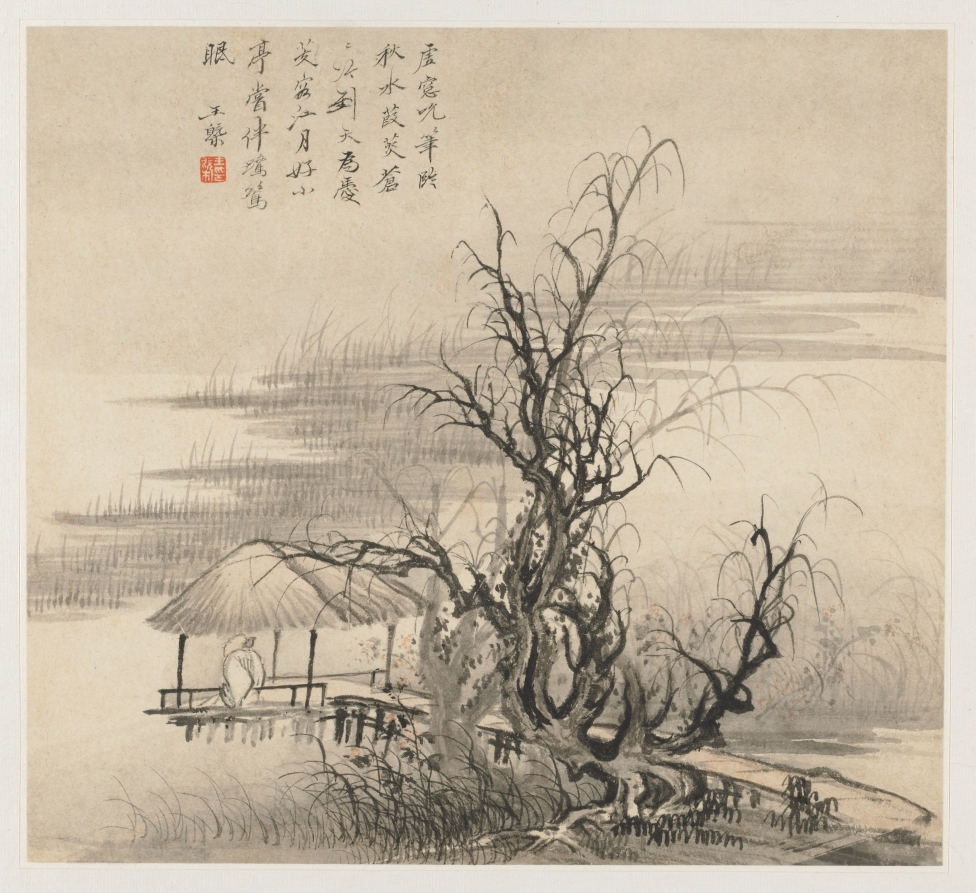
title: Album of Landscapes: Leaf 7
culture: China, Qing dynasty (1644-1911)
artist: Wang Gai (Chinese, active c. 1677–1705)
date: 1677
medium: album leaf, ink and light color on paper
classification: Painting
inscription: Artist's poem, signature and seal on leaf 7 Poem by Tai Wang-lun